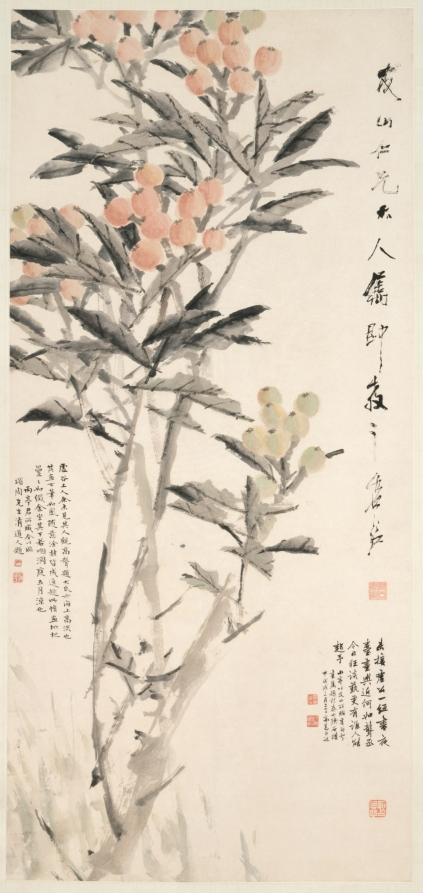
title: Pipa (Loquats)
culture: China, Yangzhou, Qing dynasty (1644-1911)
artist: Xugu (Chinese, 1823–1896)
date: c. 1888–89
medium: Hanging scroll; ink and color on paper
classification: Painting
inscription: 友山仁兄大人屬即教之，虛谷. [印]虛谷書畫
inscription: 未接虛公一經書2，夜臺畫興近何如。/ 聾丞今日狂談藝，更有誰人能起予。 雨亭以友山所貽虛谷和上畫屬，题於泰山殘石樓中，戊戌三日二十日，高邕并記。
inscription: 虚谷上人，余未見其人。觀高聾題大氏，亦海上高流也。其畫下筆如風，隨意涂抹，皆成逸趣。此幀畫枇杷纍纍如缀金，坐其下若咽洞庭五月涼也！ 雨亭君所藏，今以貽頌周先生。清道人題。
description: The loquat is a plant native to China that produces a juicy, yellow fruit in early summer. The artist may have intentionally extended the branches beyond the paper to emphasize the abundance of fruit. Xugu’s subjects of flowers, goldfish, and loquats express wishes for abundance and wealth, and must have appealed to his patrons. Xugu gave up his career as a military official during the Taiping rebellion (1850–64) and became an itinerant monk who painted for a living. He spent the later years of his life in Shanghai and his fame as an artist is associated with that city.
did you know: Xugu inscribed his painting on the right, dedicating it to a Mr. Youshan. Two additional inscriptions by other writers were added later, each time the painting changed owners.